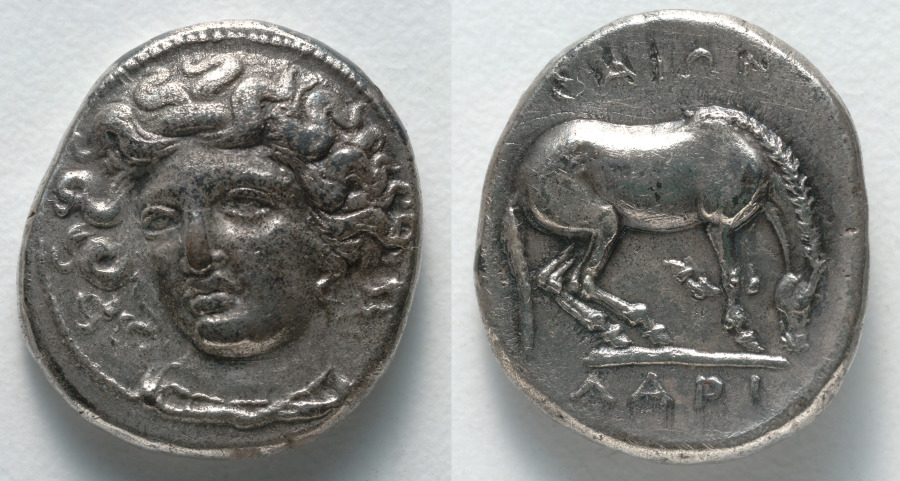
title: Drachm: Head of Larissa (Nymph) (obverse); Horse (reverse)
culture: Greek, minted at Larissa (Thessalia)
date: c. 375–320 BCE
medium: silver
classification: Coins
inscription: ΛΑΡΙ | ΣΑΙΩΝ